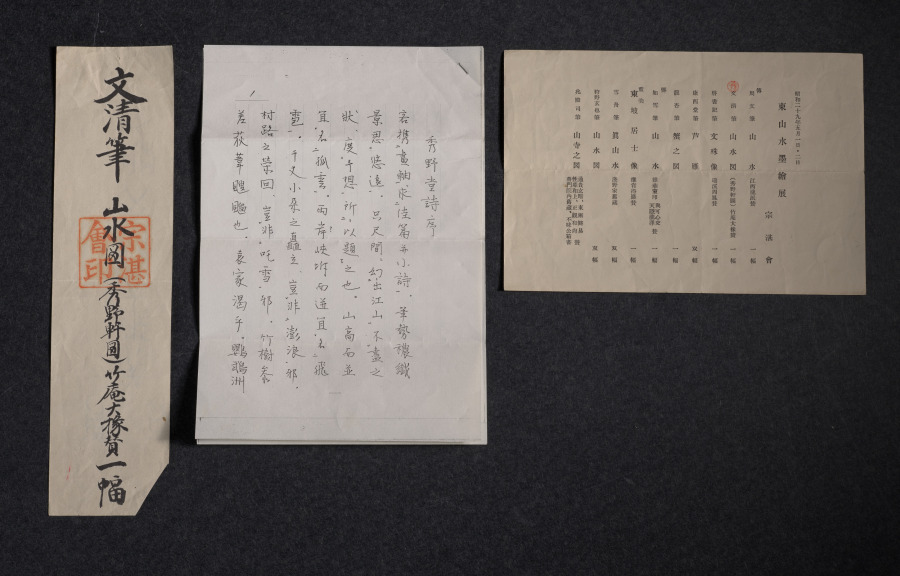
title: Shuyadō (Studio of Lofty Rusticity)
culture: Japan, Edo period (1615–1868)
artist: after Bunsei (Muncheong) (Japanese or Korean, active mid-15th century)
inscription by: after Chikuan Daien (Japanese, 1362–1439)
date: 1700s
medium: hanging scroll, ink on paper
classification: Painting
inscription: inscription by Chukuan Daien (Japanese, 1362-1439)m dated 1435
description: Hanging scrolls with assorted poems above and ink paintings below produced within Japan's Zen monastic community during the 1400s and 1500s are called poem-painting scrolls (shigajiku). This small painting was created much later in emulation of such works. While the original works often have a preface followed by poems by different monks, this composition has only a preface.